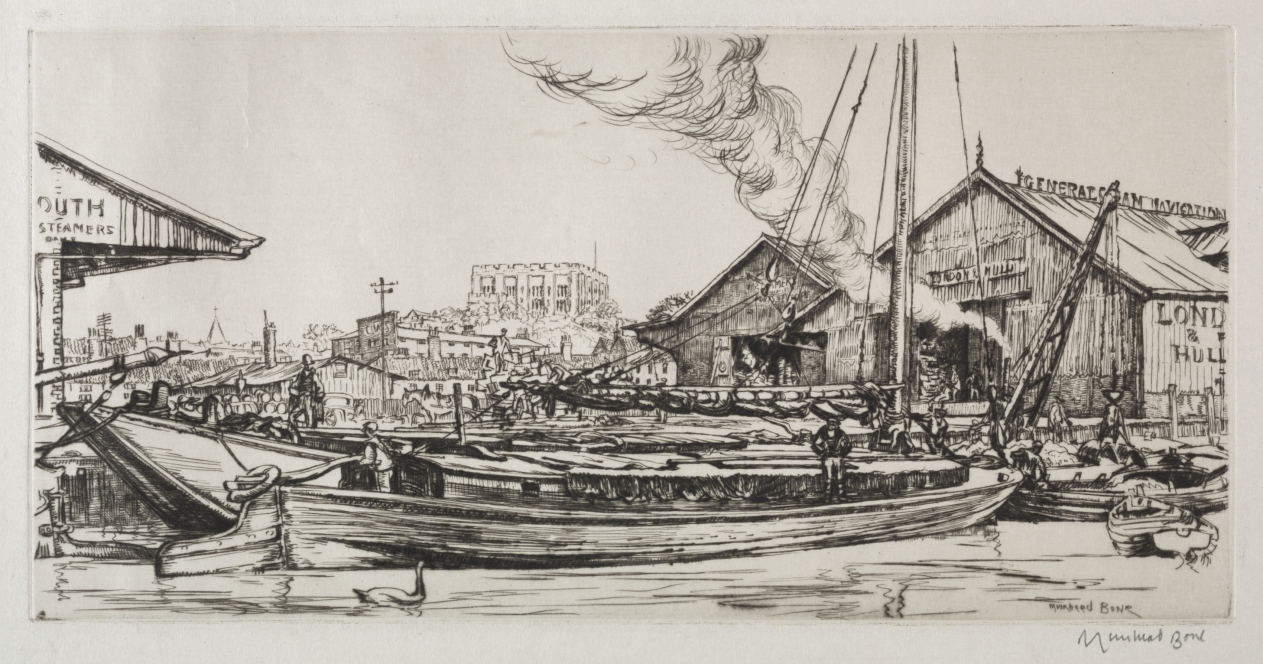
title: Norwich Castle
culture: England, 20th century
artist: Muirhead Bone (British, 1876–1953)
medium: drypoint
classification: Print